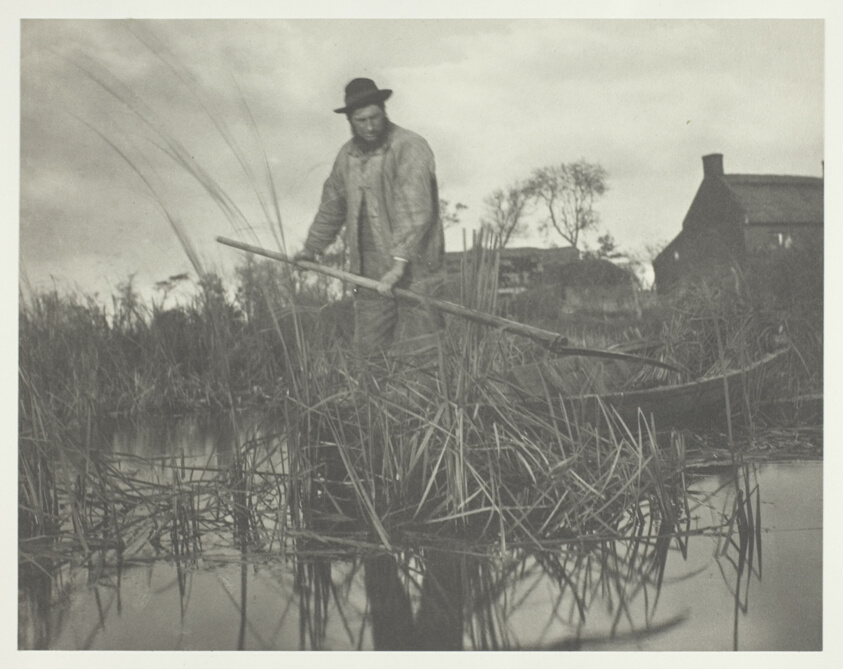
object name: Photograph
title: Cutting the Gladdon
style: 19th century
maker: Peter Henry Emerson (English, born Cuba, 1856–1936)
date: 1886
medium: Platinum print, pl. XXXII from the album "Life and Landscape on the Norfolk Broads" (1886)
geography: England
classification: platinum print; photographic process; photography; photograph